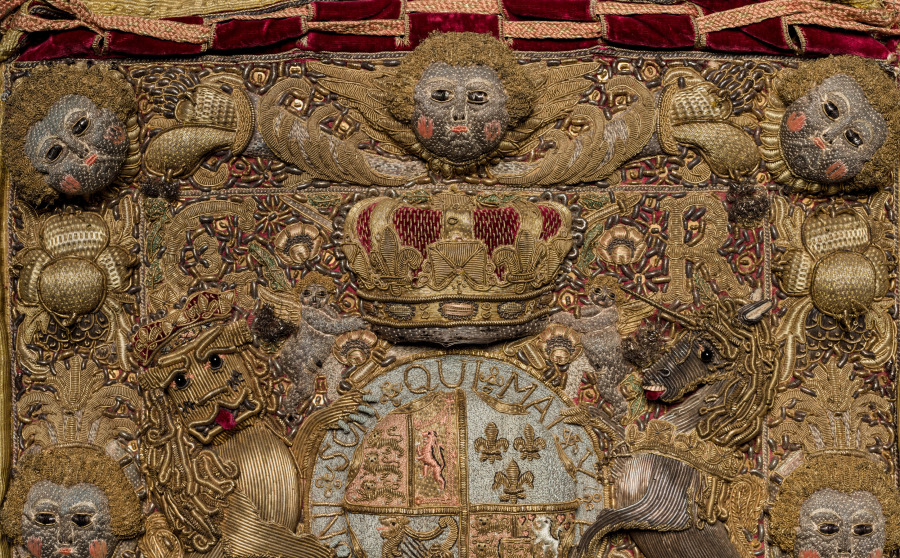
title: Lord Chancellor's Burse (Purse) with Royal Cypher and Coat of Arms of George III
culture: England, 18th century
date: 1700s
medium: red silk velvet, silk embroidery, goldwork, pearls, black beads, sequins, pendant tassels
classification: Velvet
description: A richly decorated burse (purse) to hold the monarch's Great Seal of the Realm has a traditional role in the opening of parliament. The safekeeping of the seal was the responsibility of the Keeper of the Great Seal, an office later incorporated into the role of Lord Chancellor. Because the Great Seal was attached to all major documents of state, it was the ultimate symbol of royal authority. The use of a special burse to hold the seal can be traced back to the end of the 13th century. By the end of the 16th century, the burse had evolved into the highly decorated, professional work of embroidery seen in this object. It includes the lion and unicorn surrounding the royal crest and is made from crimson velvet. Burses were replaced annually; it being a "perk" of office that the Lord Chancellor and Keeper of the Great Seal was allowed to keep the fragments of the old seal and accompanying burse. Portraits of Lord Chancellors, from the Tudor period onward, depict them with their burse. Cleveland’s collection includes one such portrait by American artist Gilbert Stuart (1755–1828) of Irish Lord Chancellor John FitzGibbon, 1st Earl of Clare (1748–1802) who was Lord Chancellor from 1789 to 1802. Baron FitzGibbon’s portrait (1919.910) is on view in gallery 204.